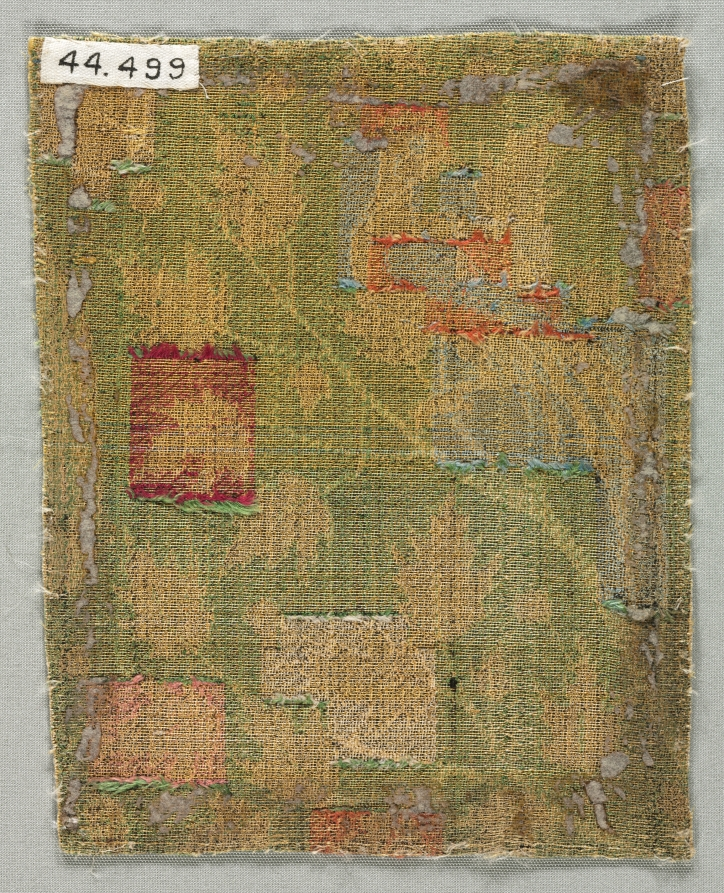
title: Velvet Fragment, Khusrau Sees Shirin Bathing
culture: Iran, Kashan, Safavid period (1501-1722)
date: 1550–99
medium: silk; velvet, cut, pile-warp substitution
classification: Velvet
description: These velvet fragments depict an episode from the Khamsa (Quintet) of Nizami (1141–1209), in which the lovers Khusrau and Shirin first see each other. A pre-Islamic king of Iran, Khusrau has fallen in love with Shirin after seeing her portrait and is traveling to meet her when he happens across her bathing in a stream. Not yet realizing that she is Shirin, Khusrau is transfixed by the woman’s beauty and covets both her and her magnificent black horse. The horse’s mane is just visible here, and she has placed her crown and tunic atop a branch.